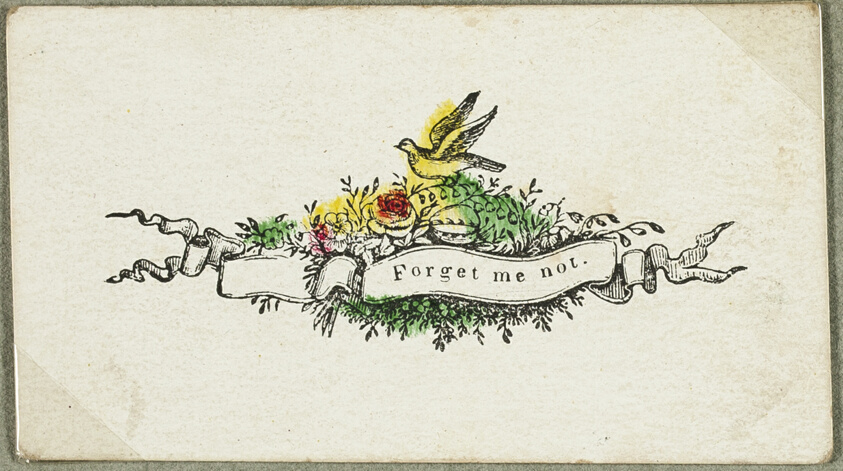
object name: Print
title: Forget Me Not (valentine)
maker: Unknown Artist; American or English, 19th century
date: c. 1830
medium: Engraving with hand-coloring on ivory card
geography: United States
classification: collage; valentine; prints and drawing; print